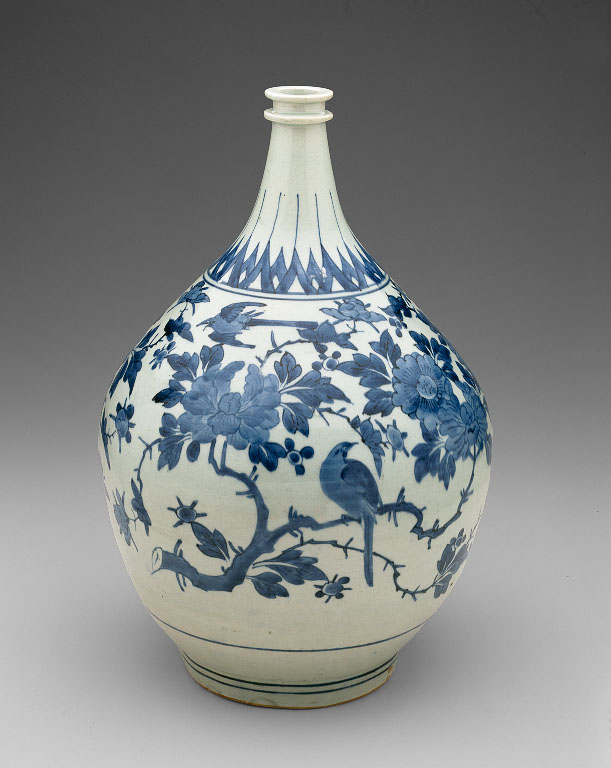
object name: Ceramics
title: Arita-Ware Apothecary Bottle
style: Japanese (culture or style)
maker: Japan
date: 1670/80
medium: Porcelain with underglaze blue decoration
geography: Japan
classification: porcelain; ceramics; asian art